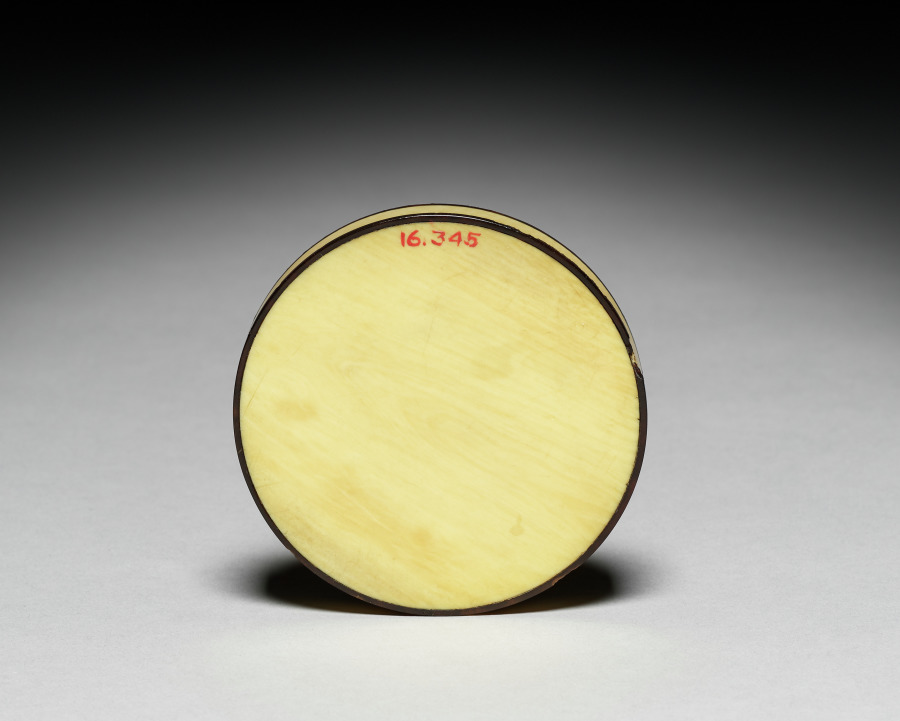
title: Snuff Box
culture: Germany, 18th century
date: c. 1770–1775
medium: tortoiseshell and ivory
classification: Miscellaneous